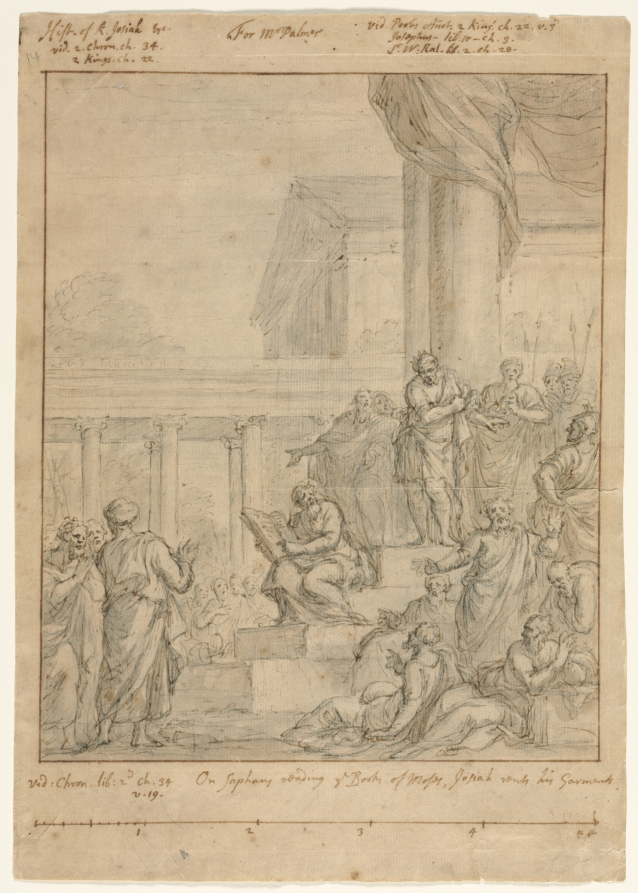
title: Study for King Josiah Rending his Garments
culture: England, 18th century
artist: James Thornhill (British, 1675–1734)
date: c. 1730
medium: pen and brown ink over black chalk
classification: Drawing